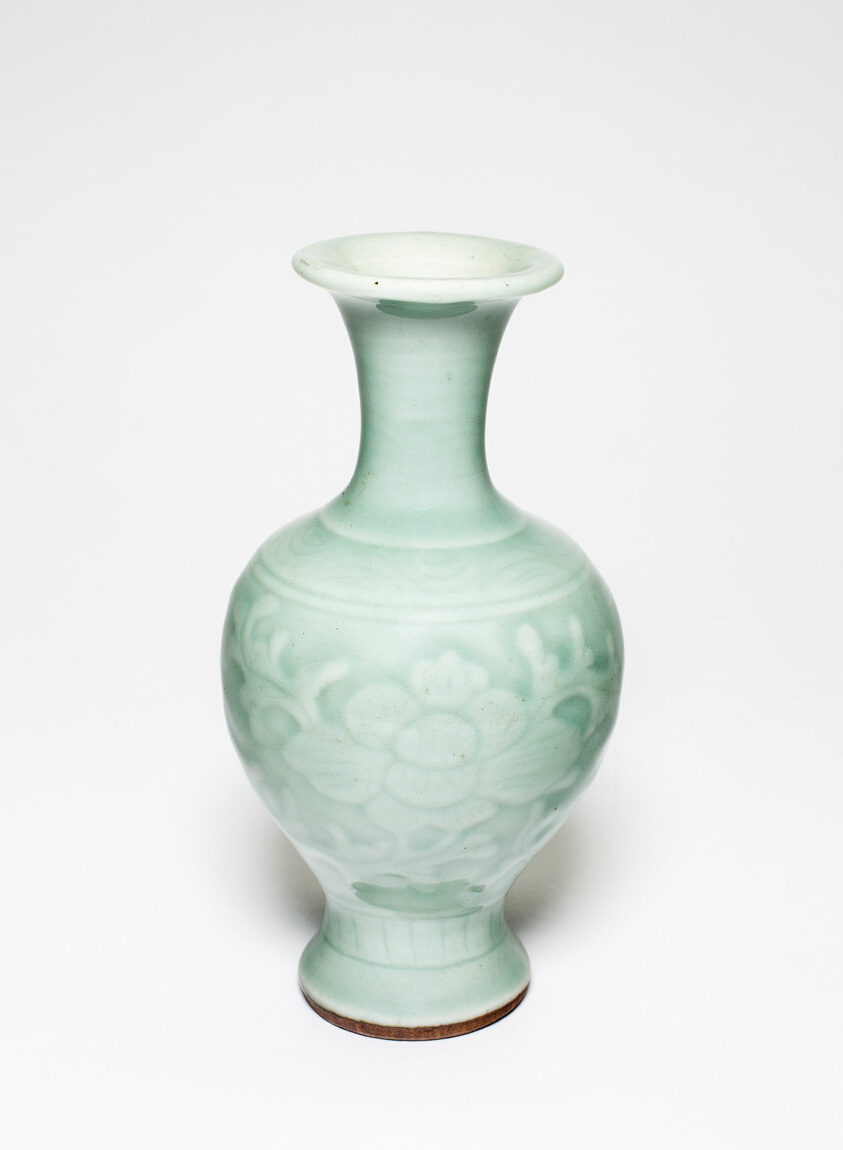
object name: Vessel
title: Baluster-Shaped Vase with Peony Flowers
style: Chinese (culture or style)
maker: China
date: Qing dynasty (1644–1911), 18th/19th century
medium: Celadon-glazed porcelain with underglaze molded decoration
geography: China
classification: vase; porcelain; vessel; asian art; ceramics